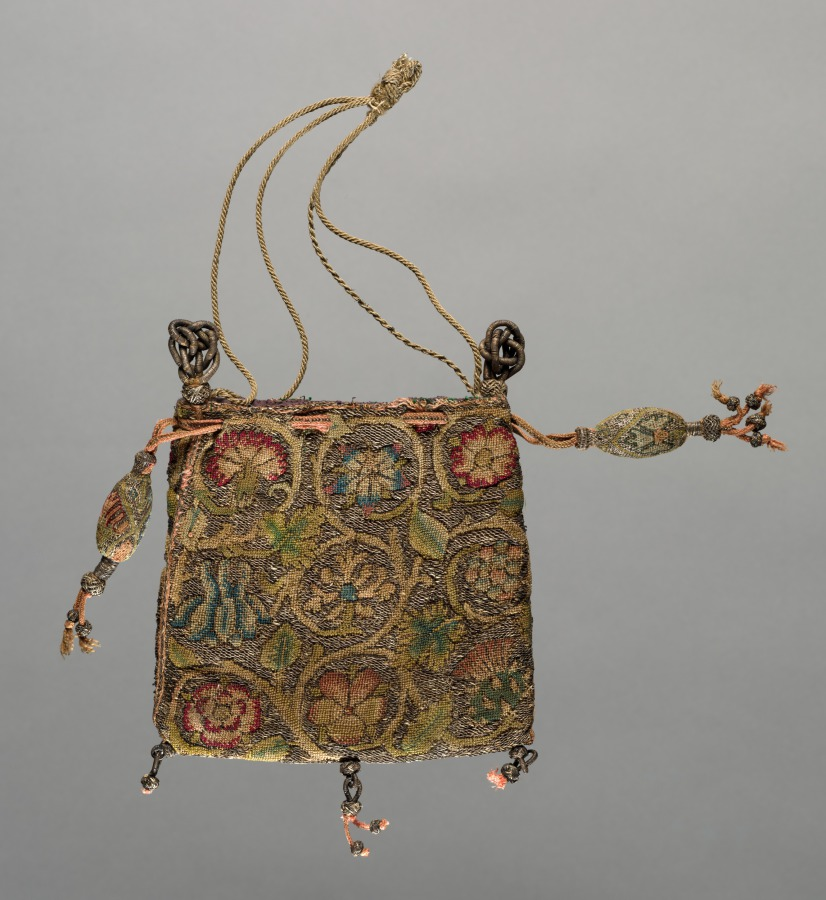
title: Purse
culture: England, early 17th century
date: early 1600s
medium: embroidery; silk and silver filé on linen ground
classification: Embroidery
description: According to Elizabethan embroidery scholar Jacqui Carey, the scale and construction of this purse and its trimmings are typical of a so-called ‘sweet bag’, a container for sweet-smelling substances. This term was popularized in George Wingfield Digby’s 1963 publication on Elizabethan embroidery; Digby used the term to describe small English purses dating from the 1500s and 1600s. In CMA’s example, the handle and lining look to be later replacements. The embroidery is worked on an open plain weave linen fabric with silk in a range of colors and silver metal thread (thin metallic strips wrapped around a white silk core). In places, the inked design is visible on the linen. The stitches used for the purse’s background are unusual in that they lie horizontally rather than vertically. The rectangle of embroidered fabric was folded along the base and stitched together up the sides. Ten holes are pierced through the embroidered fabric near the top edge of the purse. Two drawstrings, terminating in ornate tassels, are threaded through the holes. The nine floral motifs-- carnation, borage, rose, columbine, honeysuckle, grapes, rose, pansy and thistle—set within coiling stems and foliage are typical of the period. Two embroidery stitches were used, tent stitch and Elizabethan ground stitch.